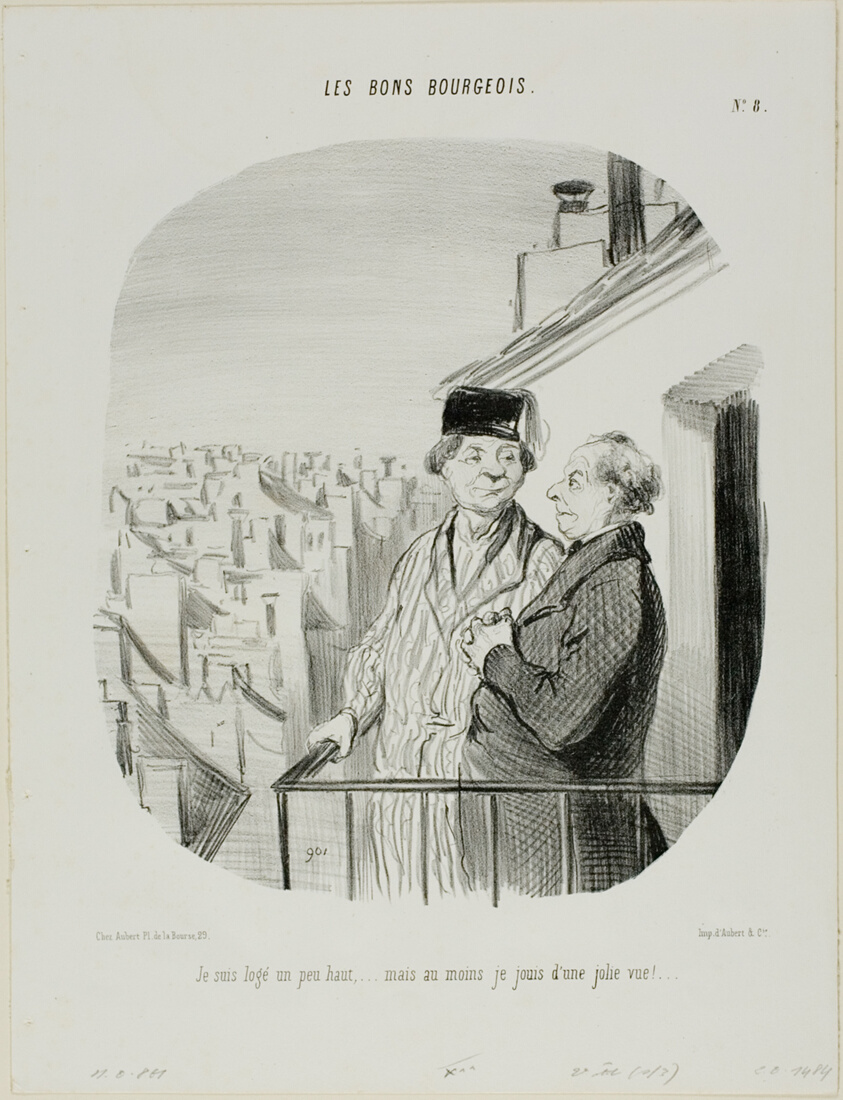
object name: Print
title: “I am living a little high up... but at least I am enjoying a beautiful view,” plate 8 from Les Bons Bourgeois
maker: Honoré Victorin Daumier; French, 1808-1879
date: 1846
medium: Lithograph in black on white wove paper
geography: France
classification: lithograph; print; prints and drawing